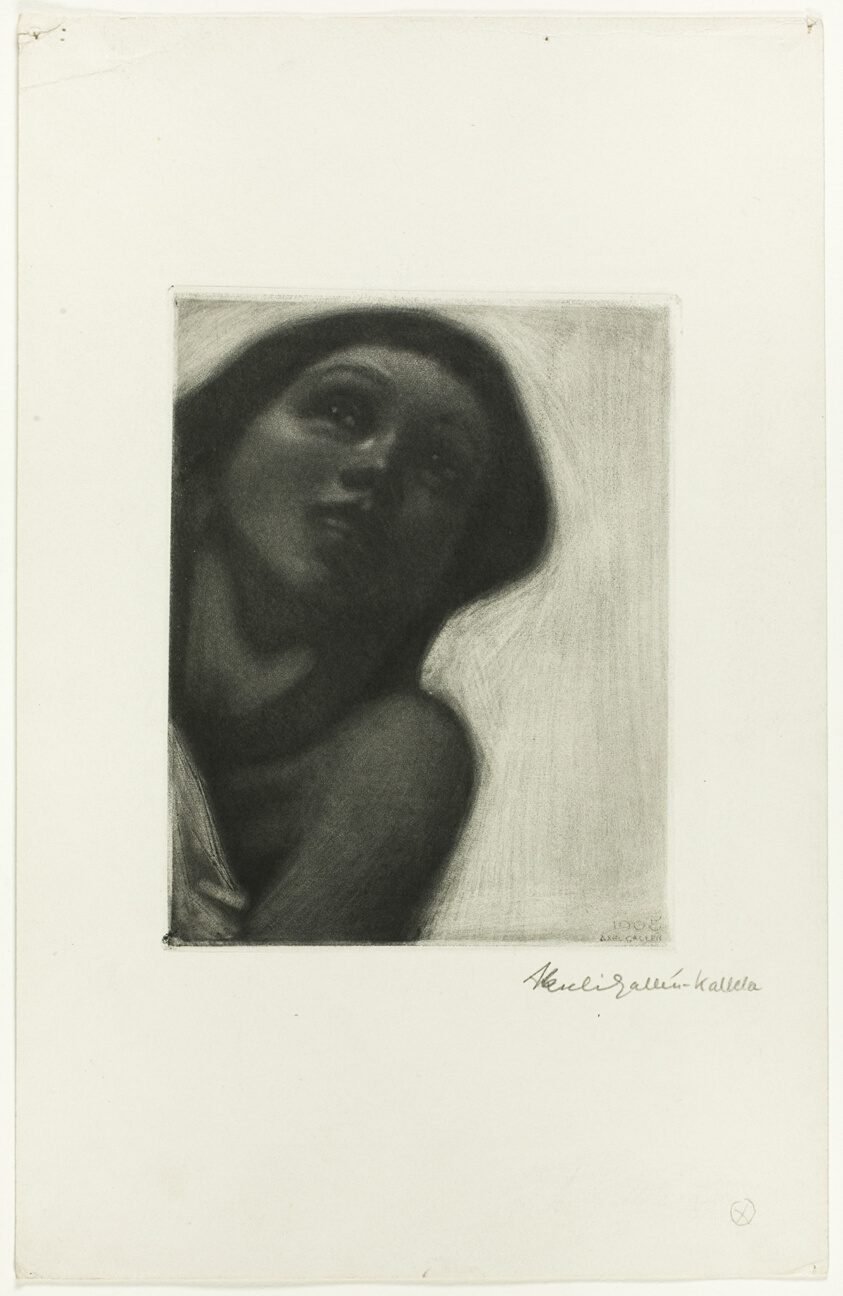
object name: Print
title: Girl's Face, from Spring Fresco of Jusélius Mausoleum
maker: Axeli Gallen-Kallela (Finnish, 1865-1931)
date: 1905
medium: Mezzotint in black on cream wove paper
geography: Finland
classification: aquatint; print; prints and drawing